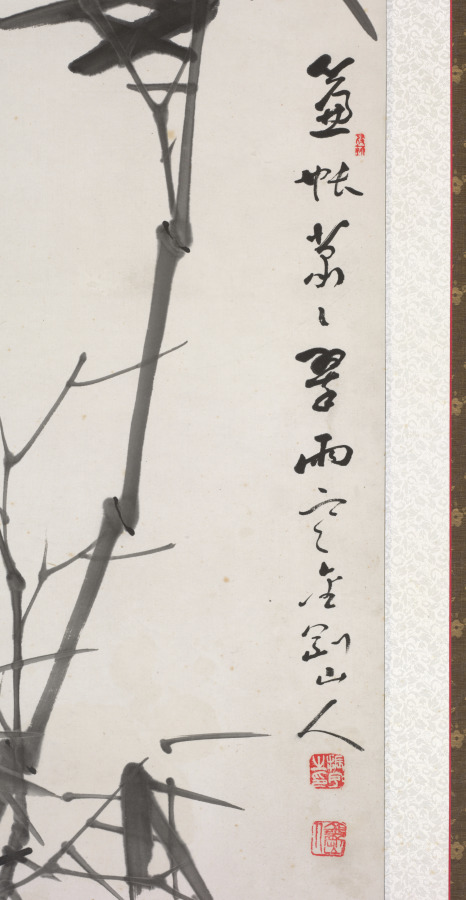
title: Bamboos in Wind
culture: Korea, Japanese colonial period (1910−1945)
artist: Kim Jin-woo (Korean, 1883–1950)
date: 1934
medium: Ten-panel folding screen; ink on paper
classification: Painting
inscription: Two chops stamped on each panel: 振宇之印 (Jinwoo’s Seal); 金剛山人 (Diamond Mountain Man)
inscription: Inscription written on the far-left panel: 甲戌流??寫於竹林堂金剛山人振宇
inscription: Inscription written on the 8th panel: 五百間淸風金剛山人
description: Active during the Japanese colonial period in Korea (1910–45), the artist Jin-woo Kim earned his artistic reputation for his expressive renditions of bamboo swaying in a strong wind. His piercing bamboo shoots are often compared to an iron spear, and their sharp leaves to a knife. It is believed that he deliberately emphasized sharpness in his brushstrokes to express his strong resistance against Japanese colonial oppression.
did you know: The artist’s prolific artistic production were a major part of fundraising efforts to support resistance activities for Korea’s independence.